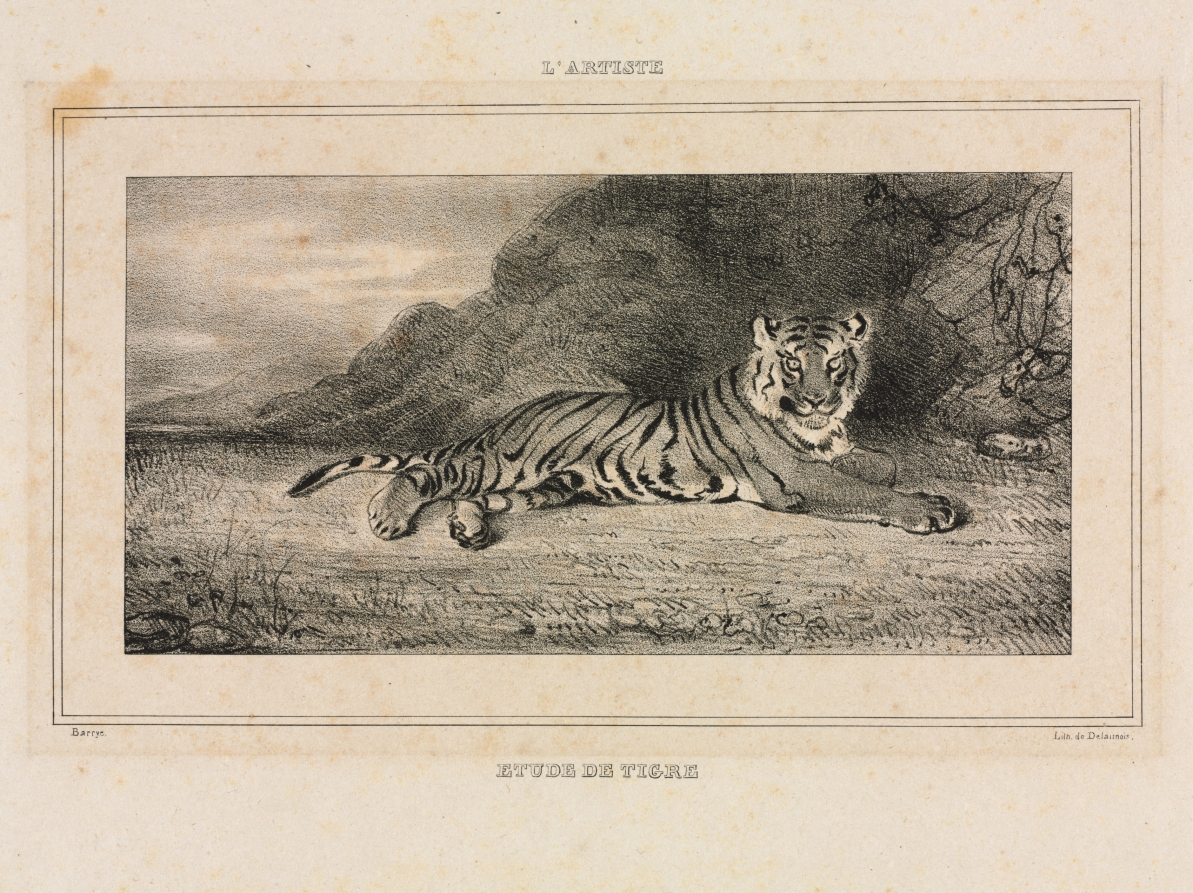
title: Study of a Tiger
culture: France, 19th century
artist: Antoine-Louis Barye (French, 1796–1875)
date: 1832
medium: lithograph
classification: Print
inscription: lower left, on stone: Barrye upper center: L'Artiste lower center: Etude de tigre